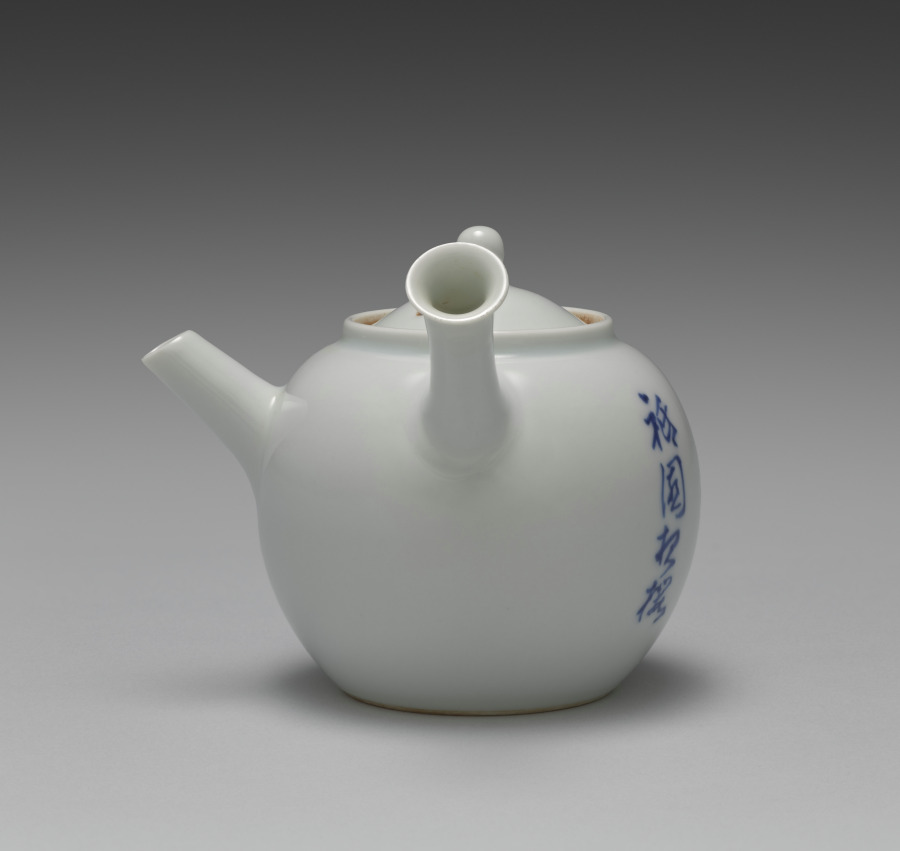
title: Teapot with Cherry at Night in Gion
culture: Japan, Meiji period (1868–1912)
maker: Seifū Yohei III (Japanese, 1851–1914)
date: 1893–1914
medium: Porcelain with underglaze blue and iron oxide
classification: Ceramic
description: This side-handled sencha teapot with the cherry tree has a nearly spherical shape, and its recessed lid has an ovoid knob. It has both blue and a purplish brown under the glaze for the blossoms and embers on one side, and the vertical calligraphy identifies the tree as a cherry tree at night in the Gion area of Kyoto. To the right of the tree, smoke billows from a small lantern fire in a basket suspended on a post. In terms of collecting history, a paper inserted into the box of Teapot with Cherry at Night in Gion is of interest. It is a flyer for Yamamoto Shōseidō, a shop (no longer extant) that sold fine Kyoto ceramics in Osaka.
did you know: This teapot features the Japanese theme of a blossoming cherry tree in the Gion area of Kyoto in underglaze blue and brown.